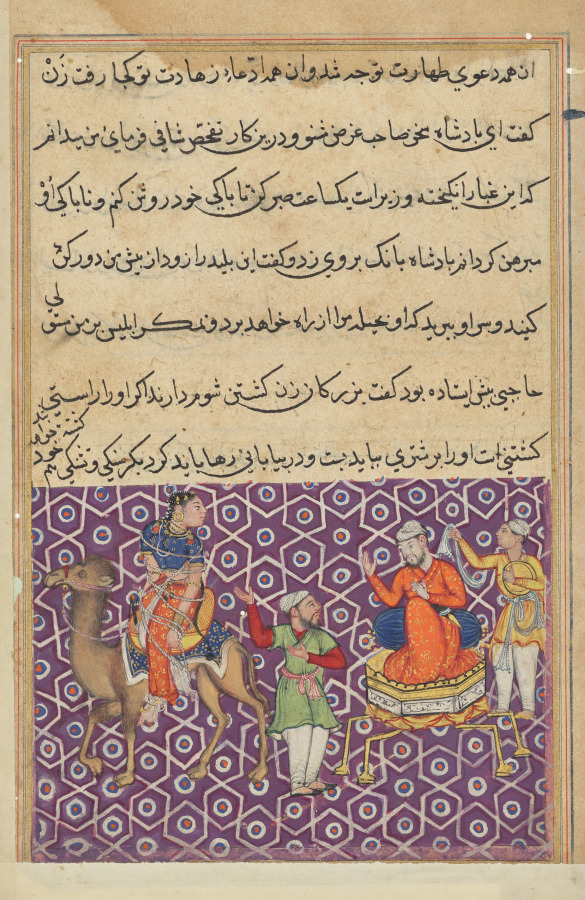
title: King Bahram, who has married Khassa’s daughter, has her tied to a camel to be abandoned in the desert as a result of false accusations made by Khulasa, from a Tuti-nama (Tales of a Parrot): Fifty-first Night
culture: Mughal India, court of Akbar (reigned 1556–1605)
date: c. 1560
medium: gum tempera, ink, and gold on paper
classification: Painting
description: The king, seated on a long-legged throne, furiously orders his wife’s execution. Khulasa, the king’s vizier, has attempted and failed to seduce her. Spurned by the queen’s rejection, he accuses her of committing adultery with another member of the court. At the center of the scene, a minister implores the king to abandon his wife, rather than have her beheaded.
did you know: The king is compared to Rustam, a legendary Persian warrior.